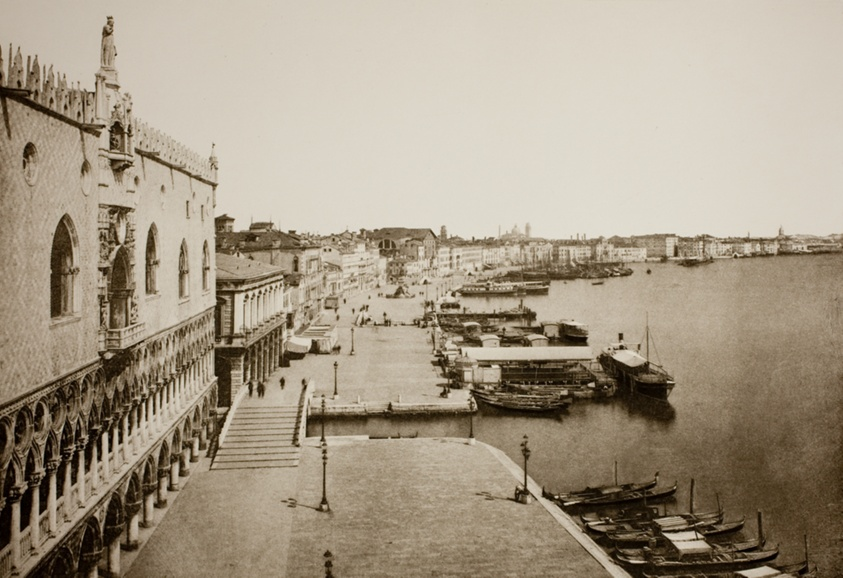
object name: Photograph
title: Untitled (89)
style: 19th century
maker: edited by Ferdinando Ongania; Italian, 1842–1911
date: c. 1890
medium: Photogravure, No. 89 from the portfolio "Calli, Canali e Isole della Laguna"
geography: Italy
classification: photograph; photography